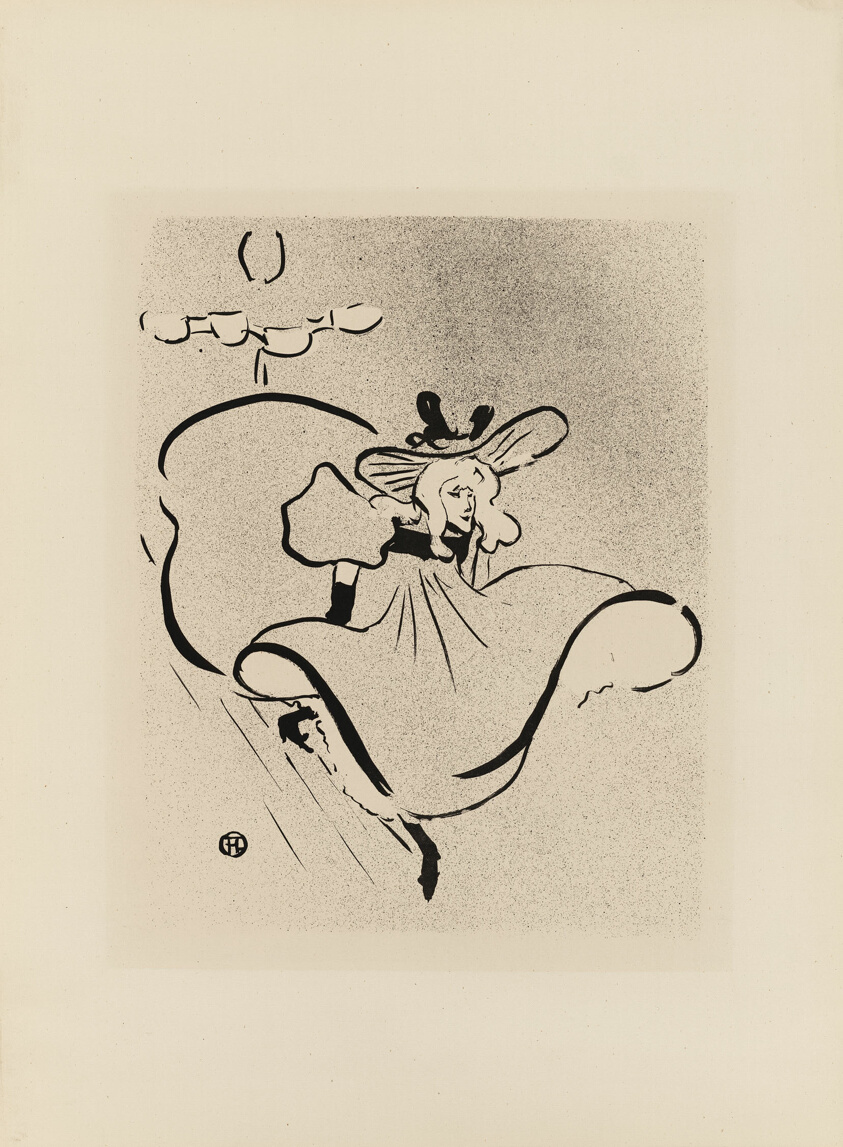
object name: Print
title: Jane Avril, from Le Café-Concert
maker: Henri de Toulouse-Lautrec (French, 1864-1901); printed by Edward Ancourt & Cie (French, 19th-20th c.); published by L'Estampe originale (French, 1893-1895)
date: 1893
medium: Lithograph on ivory wove paper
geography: France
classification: lithograph; print; prints and drawing